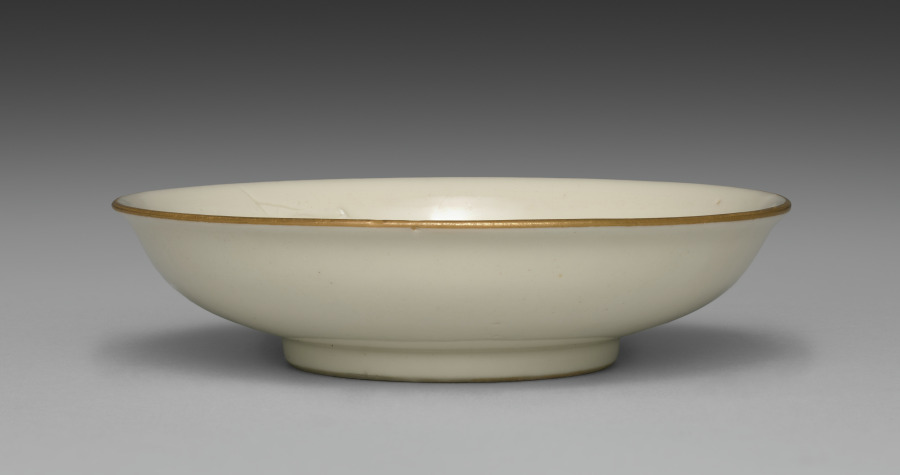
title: Small Dish from Dining Set with Plum Blossoms and Cracked-Ice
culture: Japan, Meiji period (1868–1912)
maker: Seifū Yohei II (Japanese, 1844–1878)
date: c. 1875–78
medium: Porcelain with molded designs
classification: Ceramic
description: Each item in this set has a delicate low-relief design of flowering plum branches over scattered, intersecting lines meant to resemble the cracked-ice surface of a frozen body of water and is signed on the base in gold pigment. While Yohei II produced many fine works in underglaze blue, like those produced by Kiyomizu Shichibei, he also made works in quite different styles later in his career, from the early 1870 s. In 1873, he was appointed purveyor to the Industrial Center of Kyoto Prefecture, a designation associated with Kyoto’s efforts to reach an international market through the port of Kobe; and from 1875 until his death, he was involved in national-level projects to present Japanese ceramics across the world. It was during this period that Yohei III was apprenticed to Yohei II, and it has been suggested that this set may in fact be an early example of Yohei III’s work, which he signed with his teacher’s name. Decorated with flowers resembling Japanese textile motifs, the set calls to mind the design of Yohei II’s pair of vases with plum blossoms in the Victoria and Albert Museum. Here, the elaborate trees created for a formal public exhibition setting have been translated into the approachable blossoms of the genteel domestic environment. While the designs are consistent across the pieces, each raised flower petal and pistil and each incised line in the ice was done by hand, so the cups, bowls, and dishes are similar yet unique. The bottoms of two boxes once identified the set’s owner, but the information has been deliberately obscured with black ink. However, inscriptions still visible appear to indicate two occasions, once at the end of July 1886 , and once again in June 1916 , when parts of the set were requested from Hokura in Niigata Prefecture. The location corresponds to a neighborhood in the present-day city of Jōetsu. The surname Tsuji 辻 also appears on a paper tag affixed to one of the box cloths. Future research may possibly reveal more about their provenance. A vase by Yohei III in a private collection combines the formal grandeur of the Yohei II vases in the Victoria and Albert Museum with the gentler design of this dining set, placing flowering plum trees against soft, scalloped-edge clouds resembling those in golden screens.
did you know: The dining wares have a creamy white coloration that the four boxes containing them identify as Korean in style.